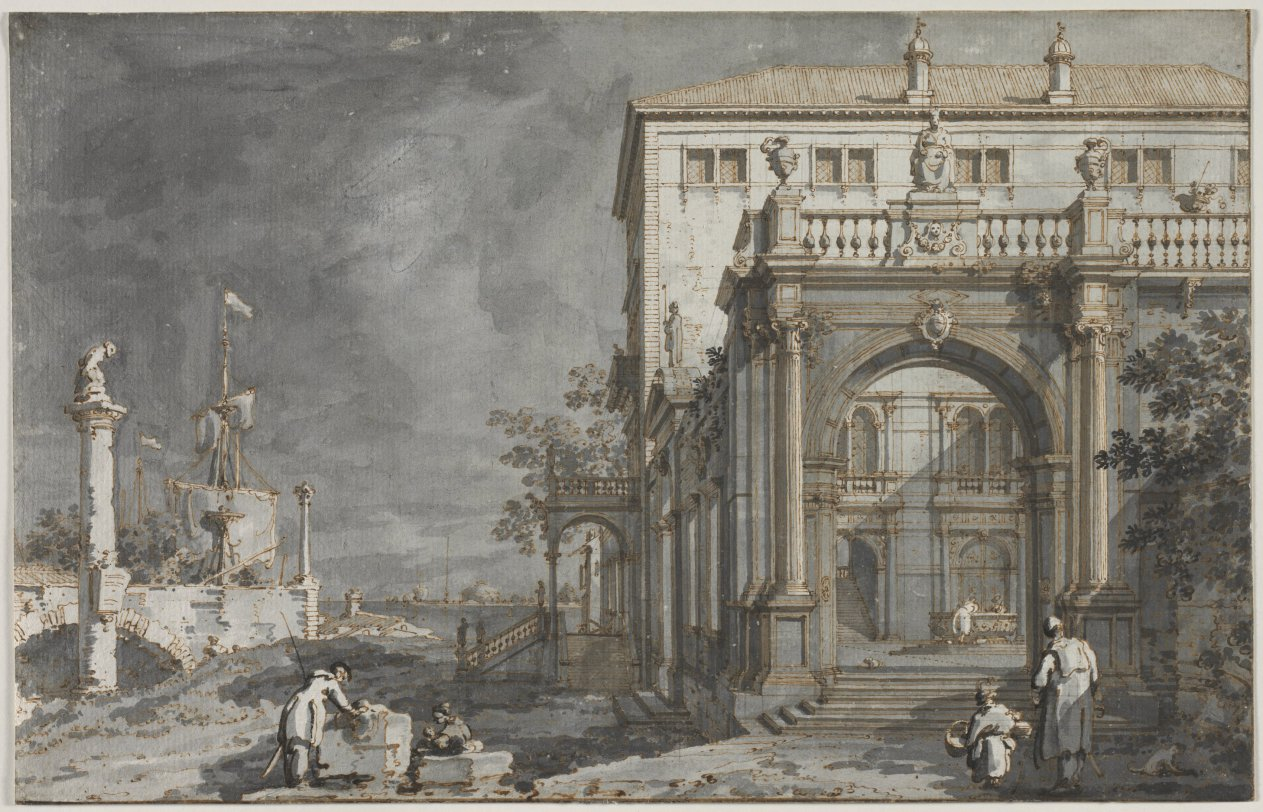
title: Capriccio: A Palace with a Courtyard by the Lagoon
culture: Italy, Venice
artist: Antonio Canaletto (Italian, 1697–1768)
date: c. 1750–55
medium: pen and brown ink and brush and gray and black washes over traces of graphite (?); framing lines in pen and brown and black ink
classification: Drawing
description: Privileged young Europeans embarking on the Grand Tour during the 1700s invariably visited Venice, where they purchased paintings, prints, and drawings to commemorate their trip. Canaletto’s vedute (view paintings) were particularly desirable as mementos of the city. This drawing is a capriccio—an artistic fantasy of architecture and landscape. Canaletto often referred to actual buildings in his capricci, manipulating and combining them to create his invented views. The palatial structure in this composition appropriates the neo-Palladian portal to the Palazzo Tasca in Venice; however, the lagoon, peasant figures, and architectural details are artifice. Traces of Canaletto’s graphite underdrawing are visible in the cloudy sky, as are the black chalk lines he carefully ruled in before delineating the building with pen and brush. The brown ink outlines of the composition contrast with Canaletto’s tints of transparent gray wash, which animate the drawing through their effect of flickering sunlight. Though three large, painted capricci paintings share compositional elements with this drawing, it is unclear whether it is a preliminary study, or an independent work of art.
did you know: The round building in the distance, across the lagoon, is reminiscent of the Pantheon—a former Roman temple located in Rome.